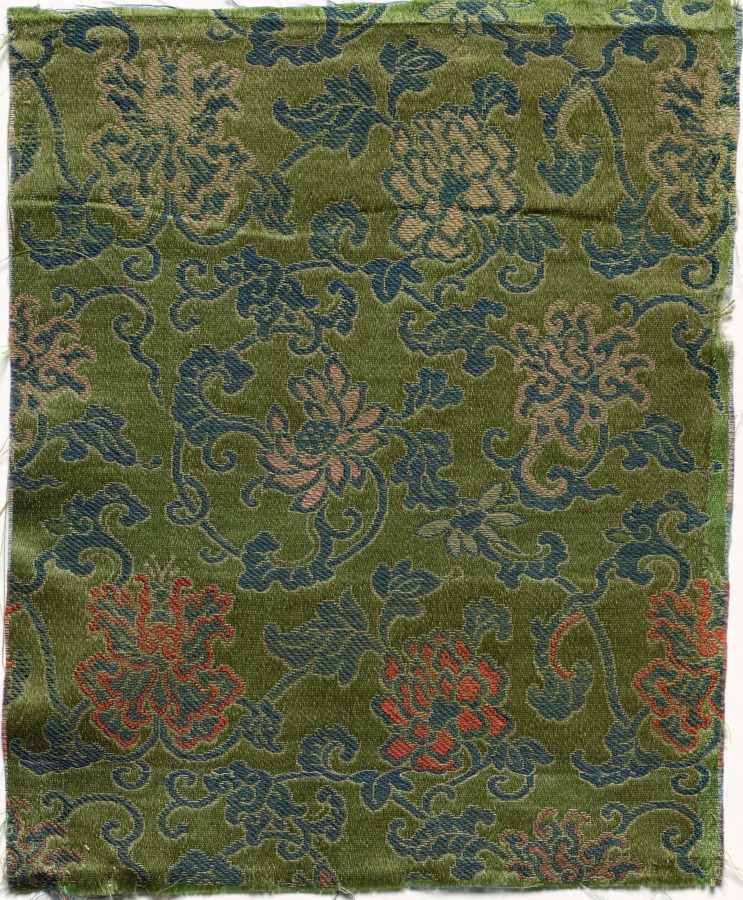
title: Fragment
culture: China, 18th century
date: 1700s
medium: silk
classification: Textile